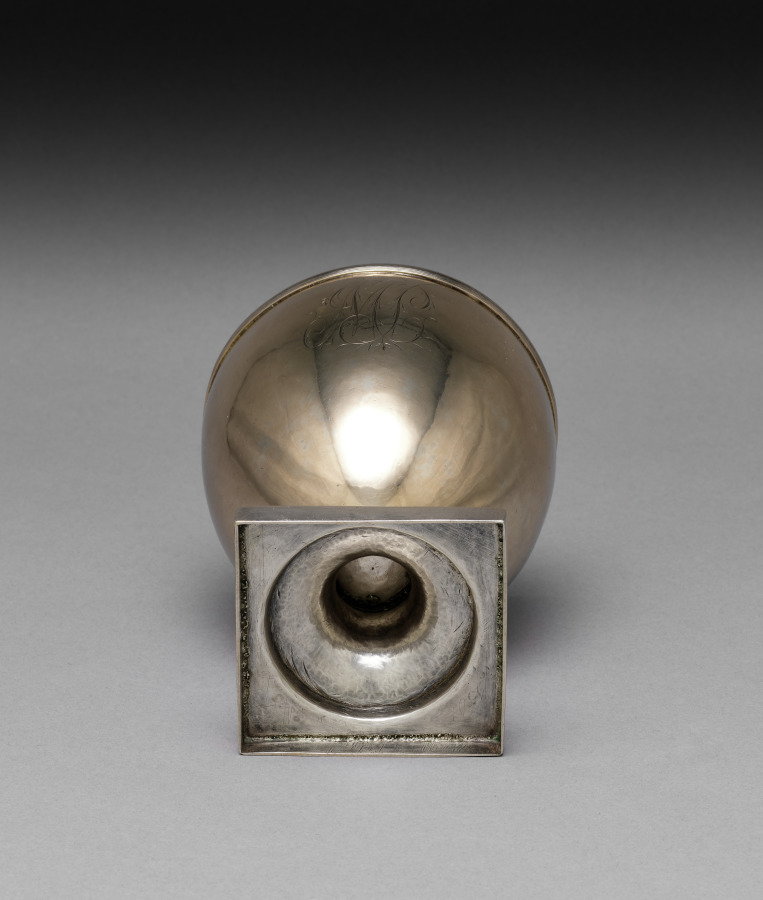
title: Sugar Bowl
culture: America, Pennsylvania, Philadelphia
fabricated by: William Haverstick (American, 1756–1823)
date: c. 1800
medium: silver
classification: Silver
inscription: engraved "MP" in bright-cut script on body.